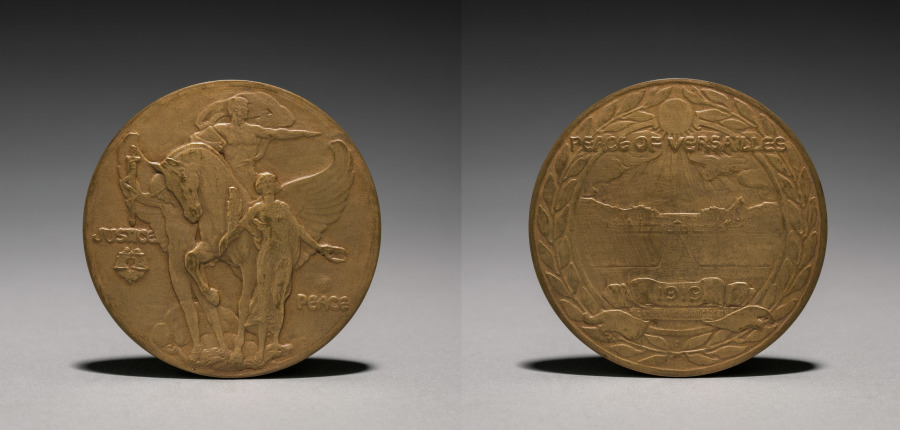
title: Medal to Commemorate the Treaty of Versailles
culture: America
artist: Chester Beach (American, 1881–1956)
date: 1919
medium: bronze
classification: Metalwork